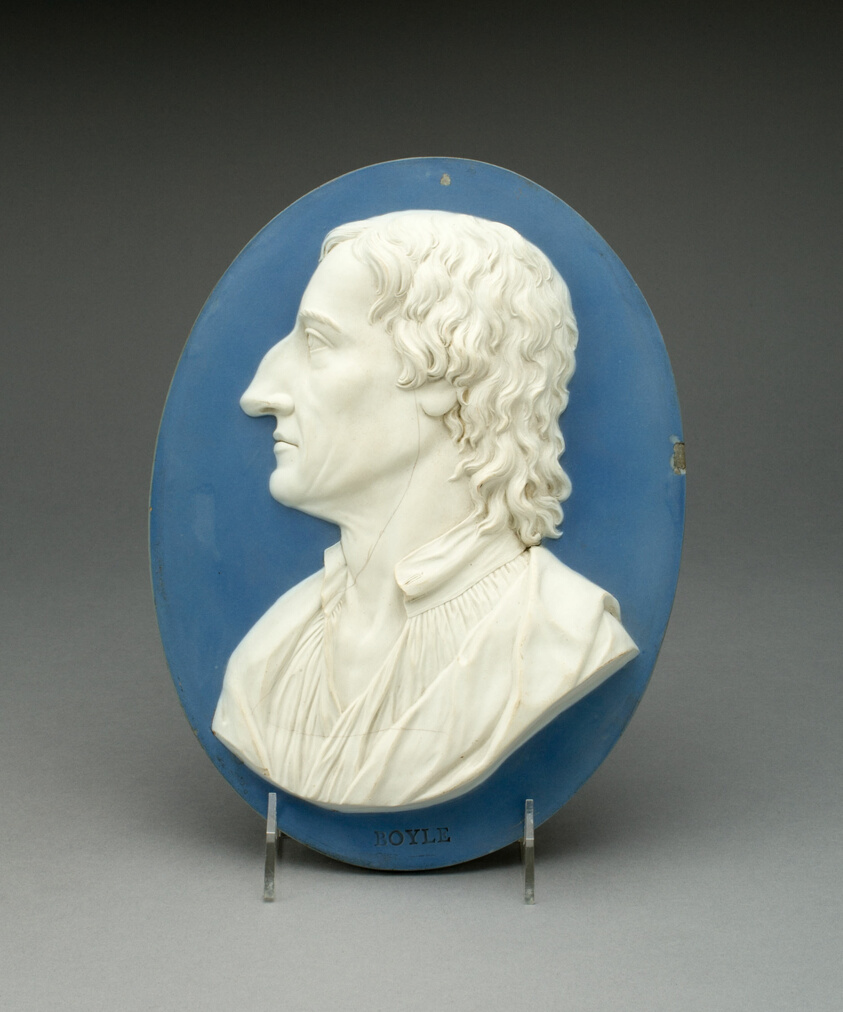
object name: Ceramics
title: Plaque with Robert Boyle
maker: Wedgwood Manufactory (England, founded 1759)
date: 1779/80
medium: Stoneware (jasperware)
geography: Burslem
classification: sculpture; stoneware; european decorative arts; ceramics